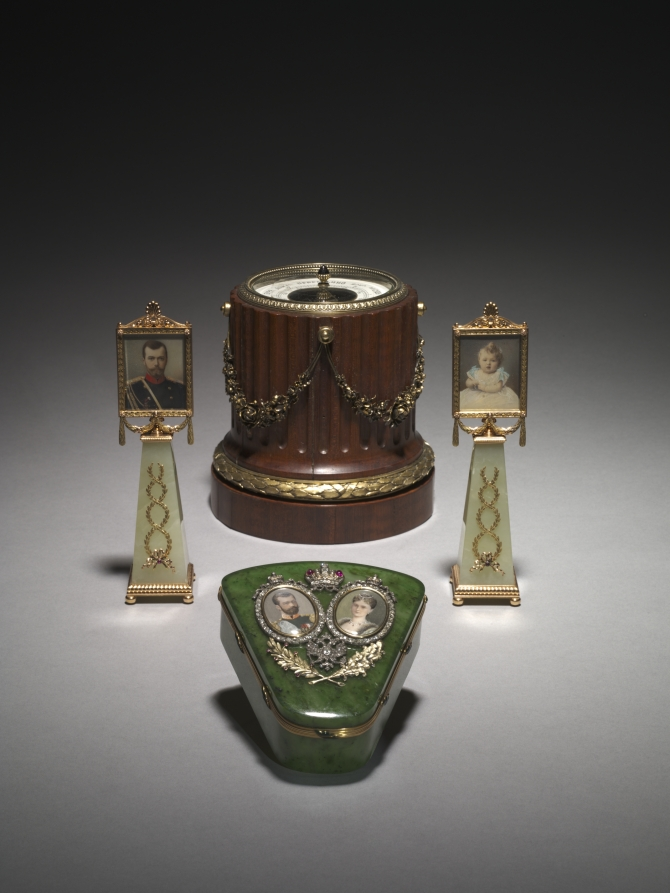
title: Quasi-Triangular Box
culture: Russia, St. Petersburg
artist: firm of Karl Karlovitch Hahn (Russian)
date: c. 1895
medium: jade, gold, enamel, diamonds, rubies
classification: Miscellaneous